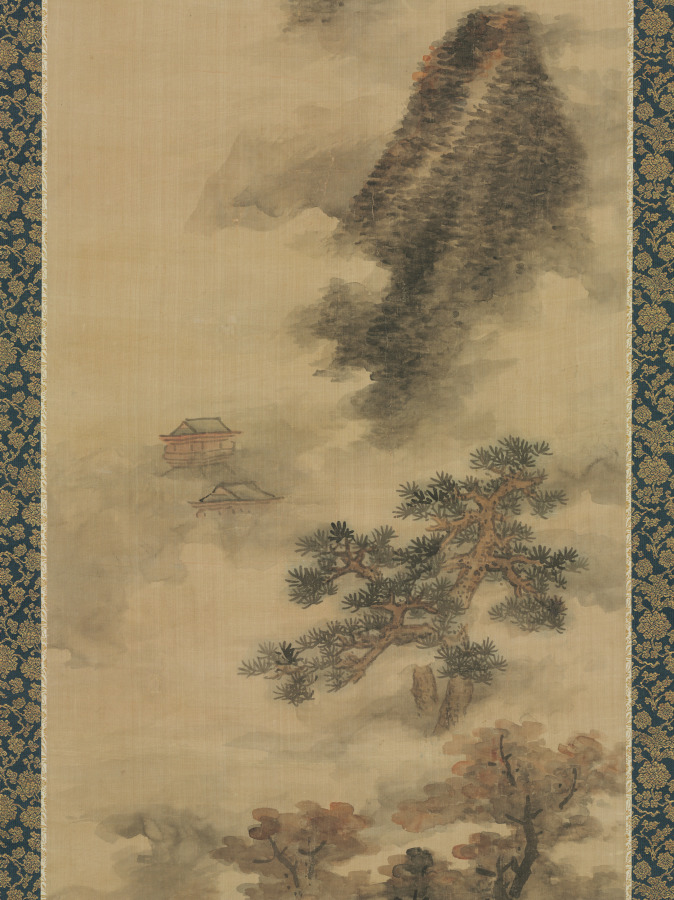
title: Clearing Autumn Mists in the Chu Mountains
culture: China, Ming dynasty (1368–1644)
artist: Lan Ying (Chinese, 1585–after 1664)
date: 1600s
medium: hanging scroll, ink and light color on silk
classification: Painting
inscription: Artist's inscription, signature, and 2 seals: Clearing Autumn Mists in the Chu Mountains, painted in the manner of Mi Haiyue [Mi Fu]. Xihu waishi, Lan Ying [seals] Lan Ying zhiyin; Shiwu toutuo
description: In his inscription Lan Yin states that he uses Mi Fu’s methods to depict this landscape. The ovoid "Mi" dots—Mi Fu’s brush idioms—are applied to give shape to the cloud-enveloped mountains and foreground tree grove for self expression. Engaging in the process of fang (imitation), he acquired the methods of various schools and masters to expand his technical range for creative transformations. Lan Yin developed his unique style and inspired major artists like Liu Du and Chen Hongshou.